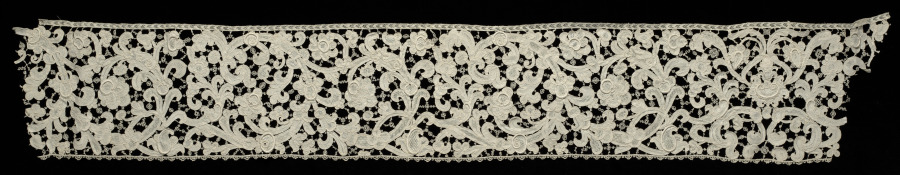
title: Lace Flounce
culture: Italy, Venice, 1600s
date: 1600s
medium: Needle lace (Venetian Raised Point) with Rosaline ground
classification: Lace